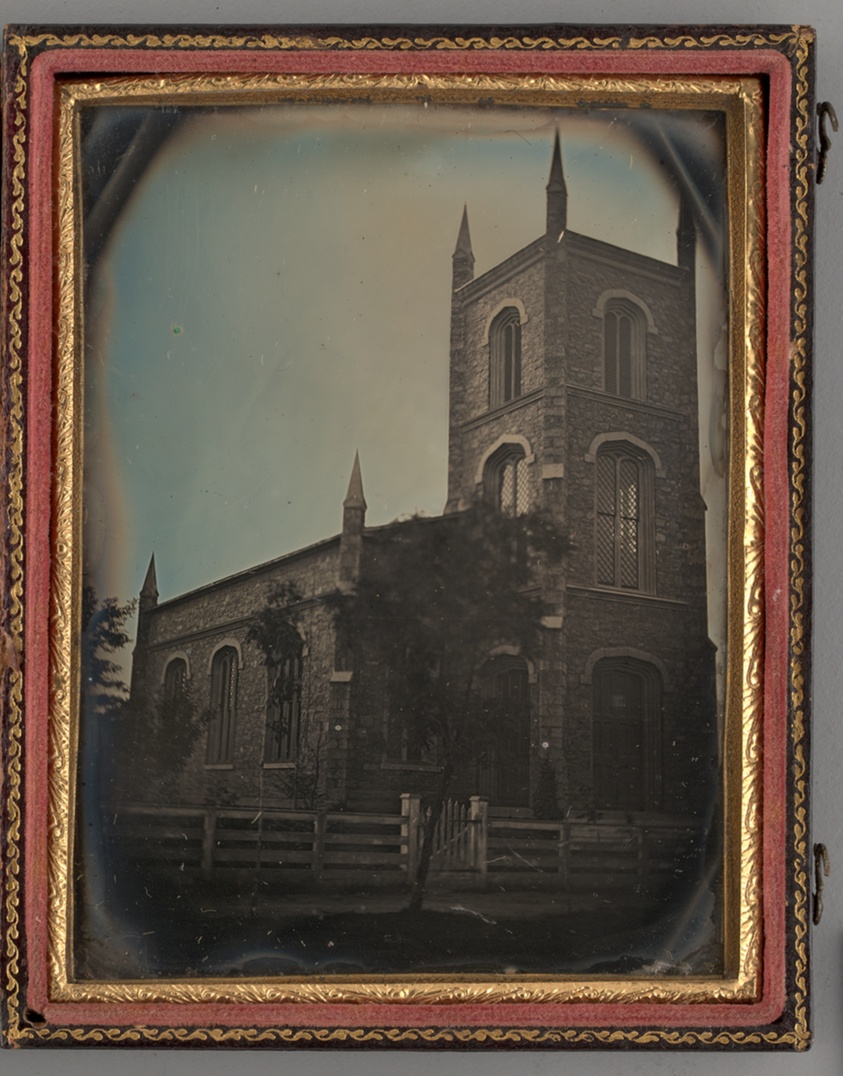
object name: Photograph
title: Untitled (Church)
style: 19th century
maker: Unknown maker; American, 19th century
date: 1855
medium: Daguerreotype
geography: United States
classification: photography; daguerreotype; portrait; portrait; photograph; photographic process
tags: lundberg collection, architecture, buildings, churches